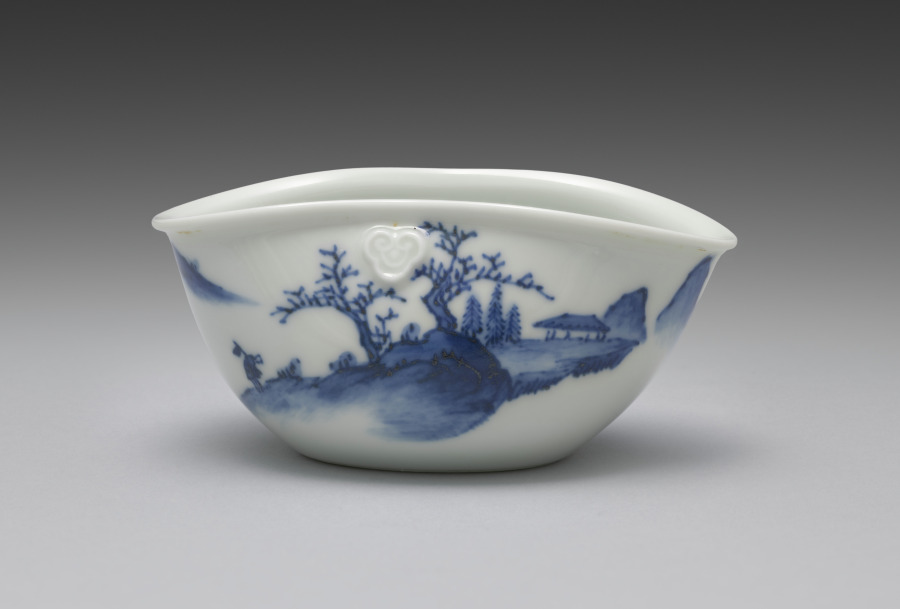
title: Water Cooler from Tea Set with Chinese Landscape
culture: Japan, Meiji period (1868–1912)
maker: Seifū Yohei III (Japanese, 1851–1914)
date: 1893–1914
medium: Porcelain with underglaze blue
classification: Ceramic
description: The kidney-shaped water cooler, yuzamashi, has a scene of a man gazing at a full moon in a dramatic mountain-scape stretching before a large compound in the woods. Another man, hunched over and carrying a heavy parcel tied to a pole over his shoulder, struggles to make his way up a hill to the site. The cooler also has a pair of applied nyoi staff-head forms for resting the tips of one’s thumb and index finger.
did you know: This is a yuzamashi, a container used to cool boiled water to just the right temperature for the best flavor when steeping.